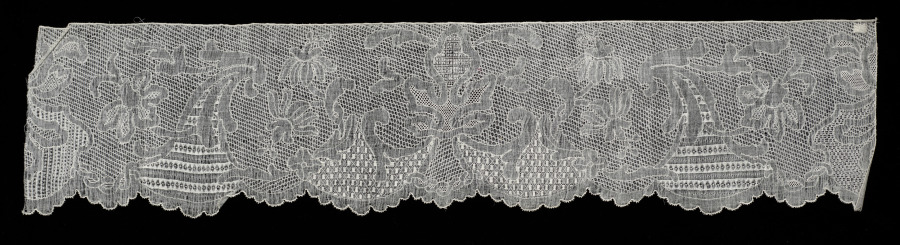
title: Lace Edging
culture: Belgium, Dinant ?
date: 1700s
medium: Linen: needle lace, drawnwork and embroidery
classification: Lace